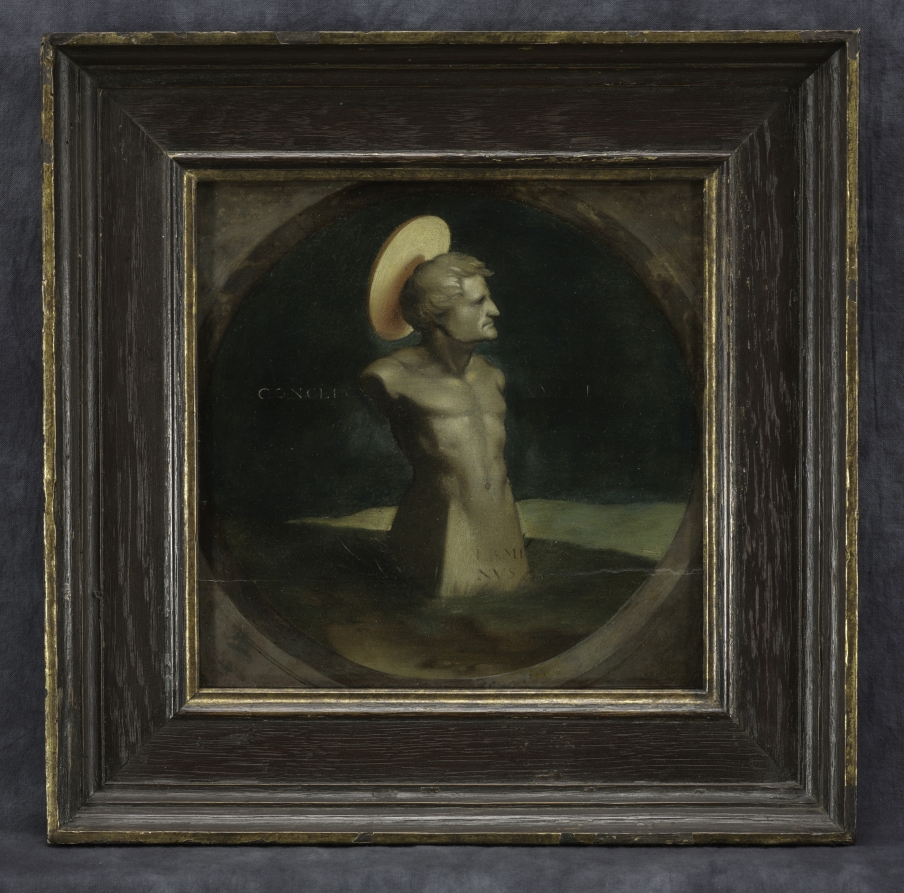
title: Terminus, the Device of Erasmus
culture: Germany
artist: Hans Holbein the Younger (German, active England and Switzerland, 1497/98–1543)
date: c. 1532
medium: oil on wood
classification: Painting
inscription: Inscribed in the middle: "CONCEDO NVLLI. [lower right: TERMI / NVS"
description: In the spirit of the Italian Renaissance, Erasmus of Rotterdam (c. 1466–1536), the celebrated Dutch humanist and scholar, embraced ancient Greek and Roman literature and incorporated much of its moral and ethical messages into his own work. Holbein here conflates Erasmus’s features with Terminus, the Roman god of boundaries, who defied Jupiter by maintaining his position atop Capitoline Hill. Erasmus adopted Terminus, along with the motto concedo nulli (I concede to no one), as a personal symbol for devotion and steadfastness.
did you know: Tree ring analysis helped determine the date of this painting.